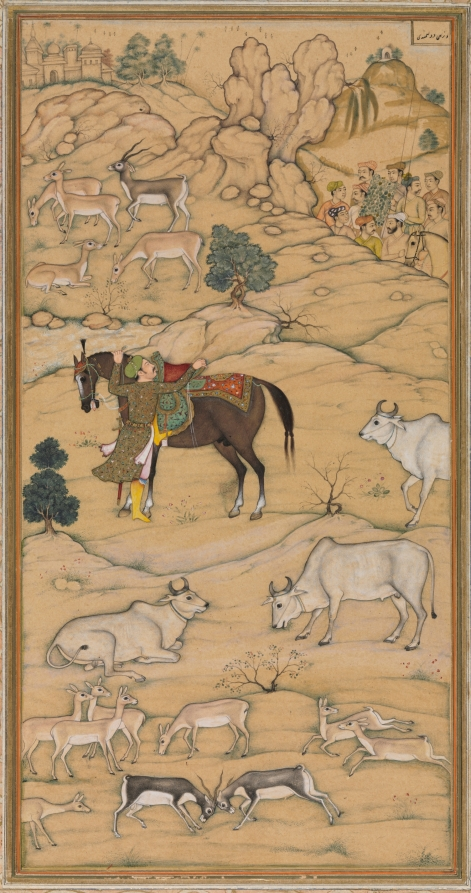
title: Akbar Mounting his Horse; page from the Chester Beatty Akbar Nama (History of Akbar)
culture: India, Mughal school, 17th century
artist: attributed to Sur Das Gujarati (Indian, active 16th century)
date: 1605–07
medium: Gum tempera and ink on paper; Nim qalam drawing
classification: Painting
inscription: recto, upper right in Persian: "Wa zahi daulatmandi"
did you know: In nim qalam drawings, literally "half pen" in Persian, most of the composition is done with monochrome washes, with only a few areas brightly colored or embellished with gold.